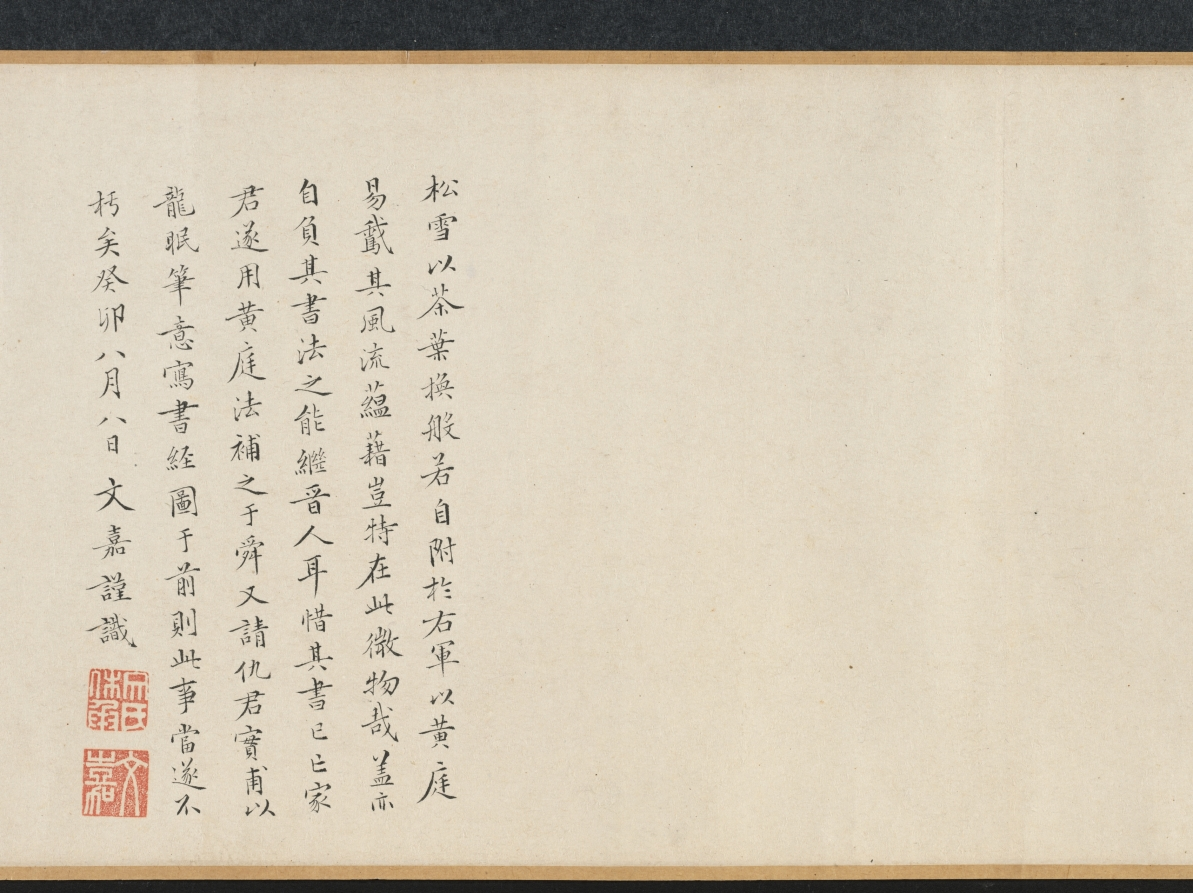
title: Zhao Mengfu Writing the Heart (Hridaya) Sutra in Exchange for Tea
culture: China, Ming dynasty (1368–1644)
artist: Qiu Ying (Chinese, 1494–1552)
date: 1542–43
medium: handscroll, ink and light color on paper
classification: Painting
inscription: Inscription accompanying text of "Heart" sutra, by Wen Zhengming 文徵明 (1470-1559): Zhengming 徵明, written in a boat at Kunshan 崑山, on the twenty-first day of the ninth month, in the renyin 壬寅 year, the twenty-first year of the Jiajing era [1542].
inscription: Colophon by Wang Shih-mou: Chou Yü-shün [Feng-lai] of K'un-shan was a scholarly, refined connoisseur of antiquities. He had acquired the poem written by Chao Ch'eng-chih [Chao Meng-fu] about the exchage of tea for Chao's calligraphy of the Prajna sutra. But the sutra itself, also written by Chao Meng-fu, is lost. He therefore asked Ch'iu Shih-fu [Ch'iu Ying] to do a painting and had Wen Cheng-ming, the artist-in-attendance, write the Hridaya Sutra in the "small, regular" style for replacement. Both works are so excellent that even Chao Meng-fu himself would certainly applaud if he should be reborn to see them. I, Shih-mou, had gotten possession of this scroll from the family of Chou Yü-shün, and since it was so wonderfully matched with one of the treasures in my collection. the Hridaya Sutra written by Chao Meng-fu for Priest Li in "running script," like the reuniting of two halves of a jade pi, I completed the scroll with the several colophons written for the "tea-exchange" poem. I did this because the painting of Ch'iu Ying and the calligraphy of Wen Cheng-ming are definitely masterpieces by themselves with absolutely no need to depend on any of the colophons written for the Chao Meng-fu poem. Furthermore, the two sons of Wen Cheng-ming, Shou-ch'eng [Wen P'eng] and Hsiu-ch'eng [Wen Chia]. have each written a colophon explaining the reason for replacing the calligraphy. As their writings are both acceptable for high standard, I didn't want to throw them away. [So by separating these into two scrolls] I was able to get two complete works of art in one clever stroke. I was quite pleased with myself, and hope that those who see this scroll shall not get suspicious because of the missing colophons. Wang Shih-mou wrote in his Jih-sun-chai study, on the first day of the tenth month, in the chia-shen year of the Wan-li era [1584].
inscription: Colophon by Wen P'eng: I-shao [Wang Hsi-chi] wrote in exchange for a flock of geese. Su Tung-po wrote in exchange for meat. Both episodes have become legends of a thousand years. Sung-hsüeh [Chao Meng-fu] "teased" Priest Kung for tea, and the story was immediately immortalized in the poems by all the famous scholars of the times. Indeed, how could one say his humor and elegance are not equal to the ancient worthies? Unfortunately, the poetry has survived but the writing of the sutra is lost. Yü-shün [Chou Feng-lai] therefore asked my father to make up the writing and so here is the complete work of art. Respectfully inscribed by Wen P'eng in the mid-summer of 1543.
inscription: Colophon by Wen Chia: Sung-hsüeh [Chao Meng-fu], in exchanging tea leaves for his writing of the Prajna, had put himself in the company of Yu-chün [Wang Hsi-chih] who exchanged geese for his writing of the Huang-t'ing sutra [the Yellow Chamber, or the Wai-ching ching, a Taoist text attributed to the Yellow Emperor]. However, was this romantic and cultivated gesture really intended for such small things? Actually, he was only proud that the excellence of his calligraphy had made him worthy to be the successor of the Ch'in Dynasty master. Since, very unfortunately, Chao Meng-fu's writing [of the Prajna] was already lost, my father therefore agreed to replace it, and did the calligraphy in the style of the Yellow Chamber. In addition, Yu-shün [Chou Feng-lai] had asked Mr. Ch'iu Shih-fu [Ch'iu Ying] to do a painting of the sutra writing story in the style of Li Lung-mien at the head of the scroll. Now it would seem the entire episode should go down in history for immortality. Respectfully recorded by Wen Chia, on the eighth day of the eighth month, in the year of k'uei-mao [1543]. trans. WKH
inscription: 4 colophons and 23 seals: 1 colophon, dated 1543, and 2 seals of Wen Peng (1498-1573); 1 colophon, dated 1543, and 2 seals of Wen Chia (1501-1583); 1 colophon, dated 1584, and 3 seals of Wang Shih-mou (1536-1588); 2 seals of Chou Feng-lai (16th c.); 3 seals of Sung Lo (1634-1713); 5 seals of the Ch'ien-lung emperor (r. 1736-95); 1 colophon, dated 1902, and 1 seal of Fei Nien-tz'u (1885-1905); 4 seals of Wan-go H. C. Weng (b. 1918); 1 seal unidentified.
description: The Yuan dynasty calligrapher Zhao Mengfu (1254–1322) is said to have transcribed the Heart Sutra for a certain priest named Li in exchange for tea. Later, during the Ming dynasty, the professional painter Qiu Ying from Suzhou painted this scene for his patron. Here, Zhao Mengfu holds a brush and has a piece of paper laid out before him. On the table is an ink stone, an ink stick, and a small water dropper. Drops of water would dissolve the ink stick into liquid ink when it was ground on the flat square stone.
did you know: Qiu Ying was born to a peasant family, but his natural talent led him to a successful career as a professional painter with wealthy patrons.